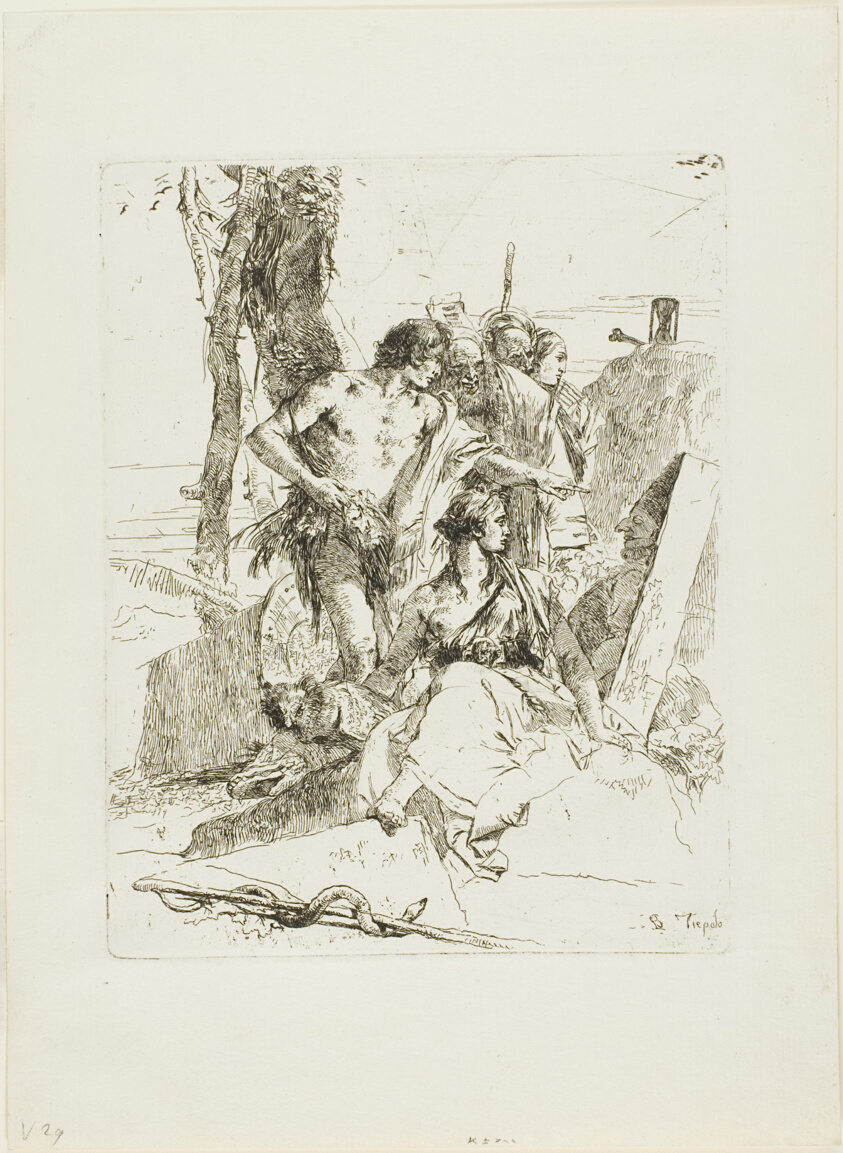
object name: Print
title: The Discovery of the Tomb of Punchinello, from Scherzi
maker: Giovanni Battista Tiepolo (Italian, 1696–1770)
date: 1735–40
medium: Etching printed in black on paper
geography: Italy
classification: etching; print; prints and drawing